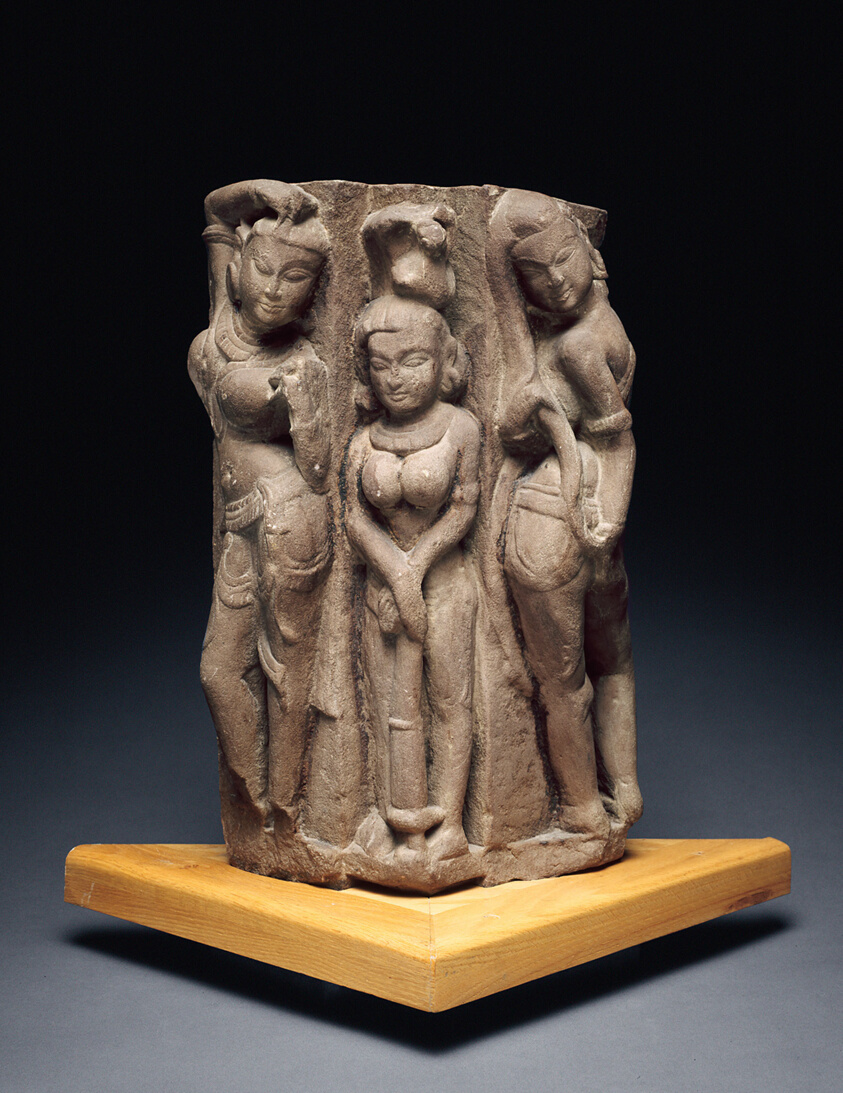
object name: Architectural fragment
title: Two Beautiful Women (Surasundari) Dressing with an Attendant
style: South Asian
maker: India; Madhya Pradesh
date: 10th/11th century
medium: Sandstone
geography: Madhya Pradesh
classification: stone (unidentified); stone; sculpture; asian art; architectural fragment